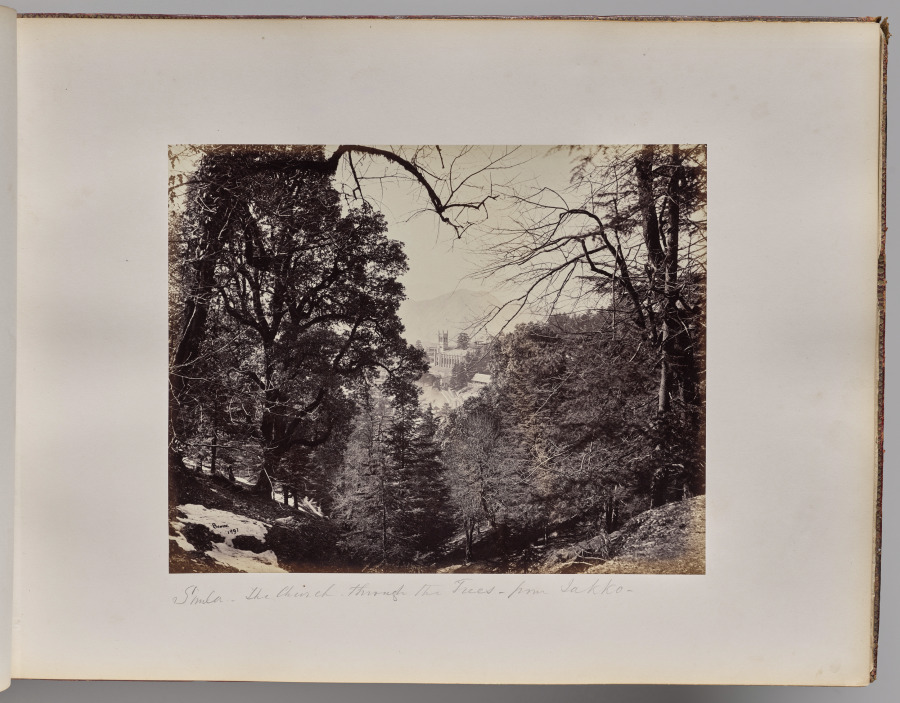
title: Shimla. The Church Through the Trees, from Jakko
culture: England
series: Photographs of Northern India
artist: Samuel Bourne (British, 1834–1912)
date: 1863–70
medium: albumen print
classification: Photograph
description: The 50 images in this album, all taken in the 1860s, move from the hill towns of the Himalayas down to cities including Lahore (now in Pakistan), Delhi, Lucknow, Agra, Benares (now Varansi), and Calcutta (now Kolkata). Architectural studies of major monuments offer valuable historical records of what sites such as the Taj Mahal and the imperial mosque of the Mughal emperors in Delhi looked like before 20th-century restorations.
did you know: Samuel Bourne, the author of most the images in this album, was a banker in England before he moved to India to become a professional photographer.